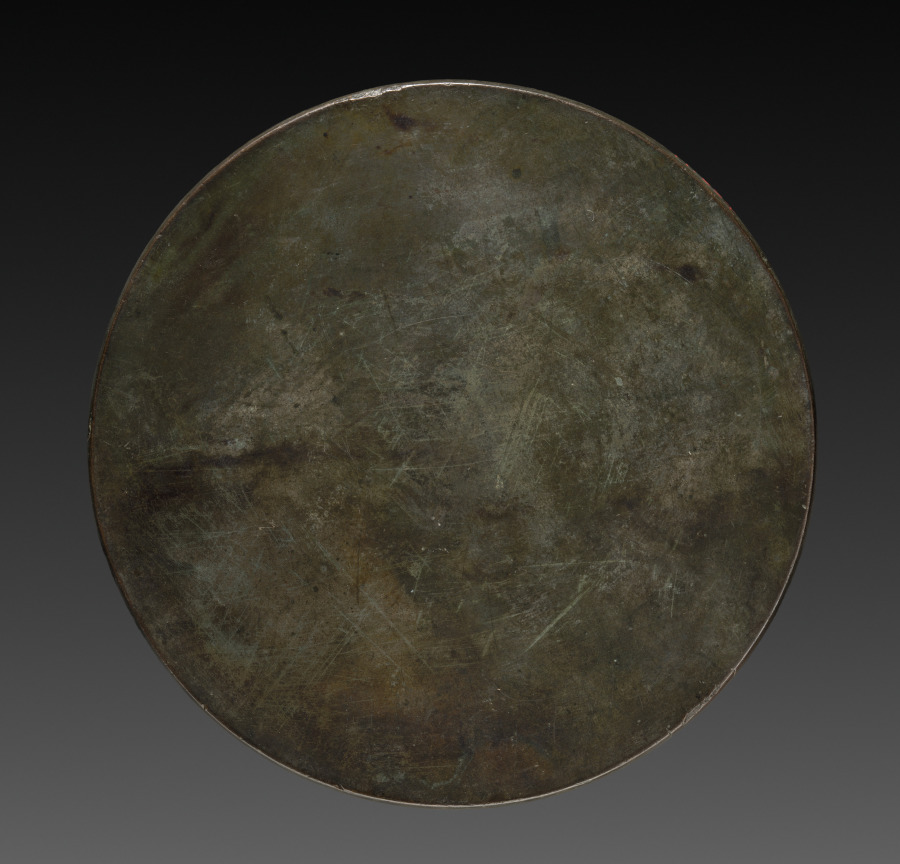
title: Mirror with Pair of Cranes in Landscape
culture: Japan, Muromachi period (1392–1573)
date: 1392–1573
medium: bronze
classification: Metalwork